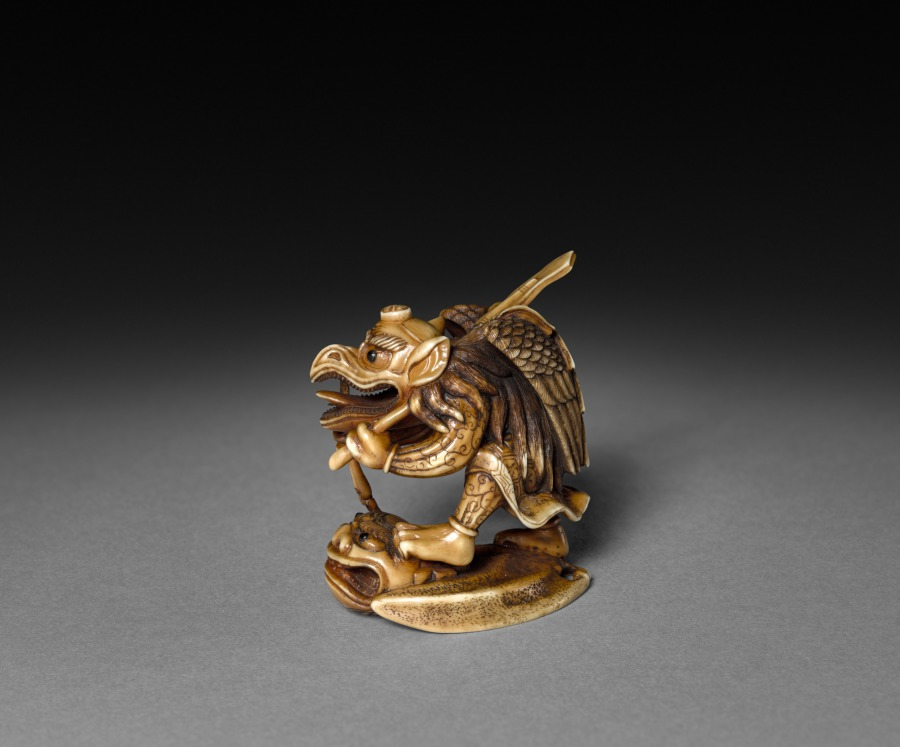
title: Tengu Travelling as a Priest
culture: Japan, Edo period (1615–1868)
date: early to mid-1800s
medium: ivory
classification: Netsuke